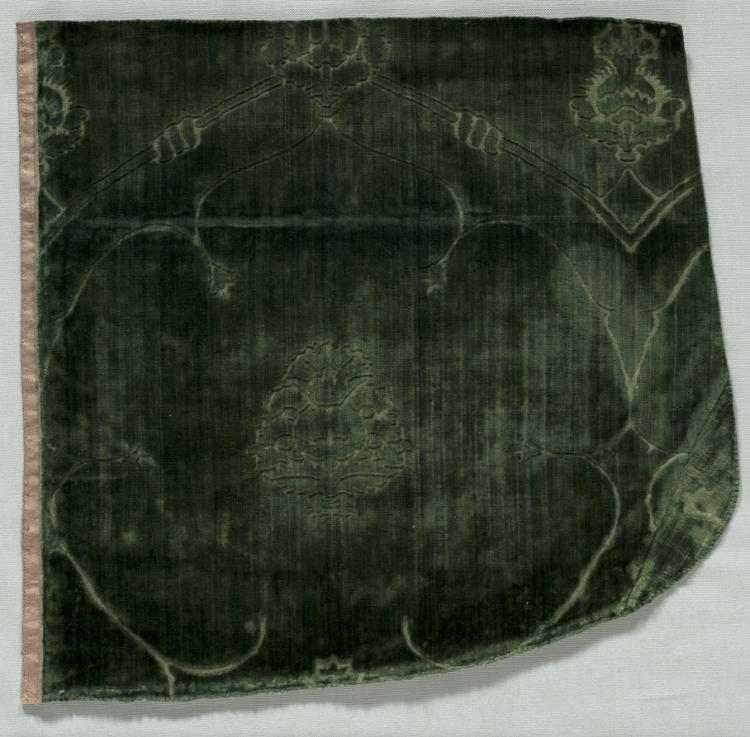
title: Velvet Fragment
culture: Italy, 15th century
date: 1400s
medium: velvet (cut and voided)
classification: Velvet